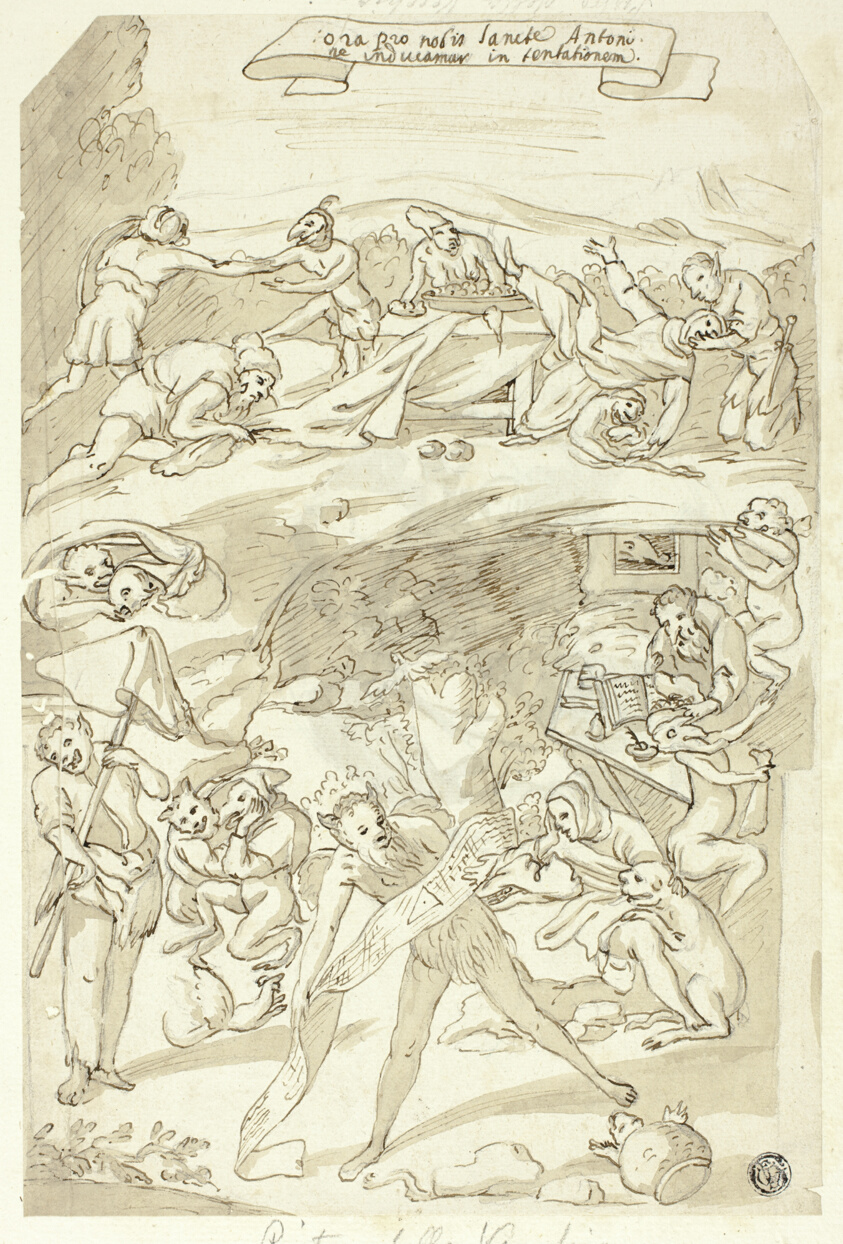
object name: Drawing and Watercolor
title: Temptation of Saint Anthony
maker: Attributed to Pietro della Vecchia (Italian, 1605-1678); or Vecchietta (Lorenzo di Pietro di Giovanni) (Italian, 1410-1480); or Piero di Cosimo (Italian, 1462-1521)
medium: Pen and brown ink, with brush and brown wash, over black chalk, on ivory laid paper, laid down on ivory laid card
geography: Italy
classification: ink or chalk wash; drawings (visual works); prints and drawing